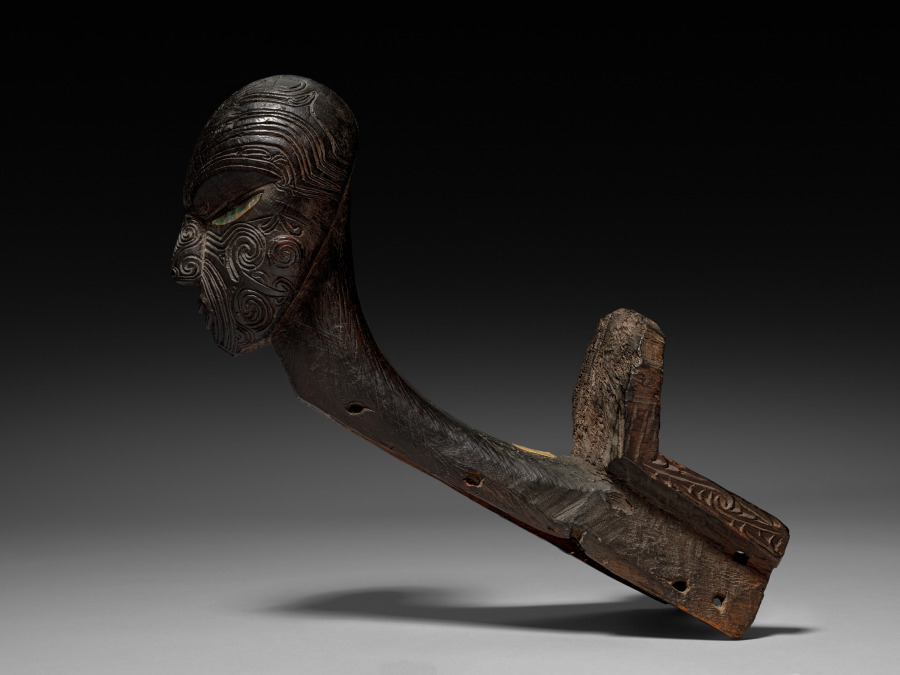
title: Fishing Canoe Prow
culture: Polynesia, New Zealand, Maori people, 19th century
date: 1800s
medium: wood with haliotis (pearl) shell inlay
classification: Sculpture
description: Intricate surface patterning characterizes Maori wood carvings. The swirls and spirals covering the face on this canoe prow replicate traditional facial tattoo patterns. Similar designs were used for post and gable figures that adorned both dwellings and compounds.